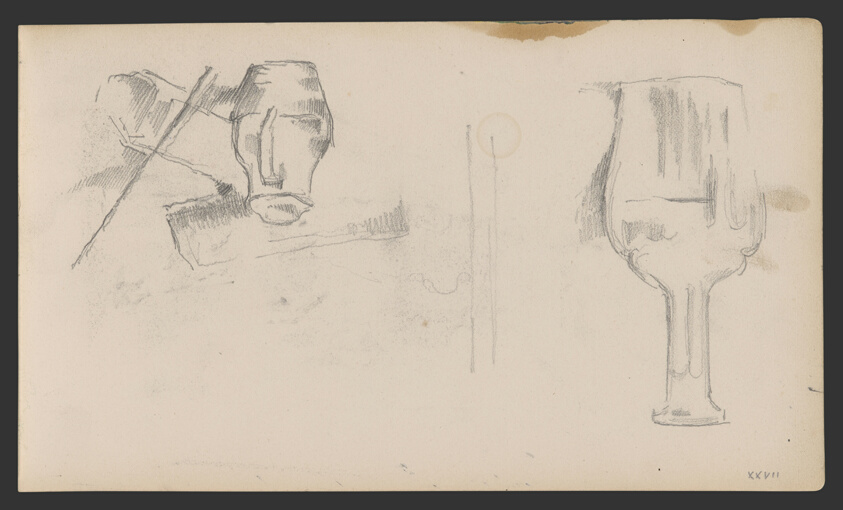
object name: Drawing and Watercolor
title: Sketchbook No. 2 (L'Estaque)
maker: Paul Cézanne; French, 1839-1906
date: 1875–86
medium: Graphite and pen and ink drawings on paper, bound into a book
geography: France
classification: sketchbook; graphite; prints and drawing; paper